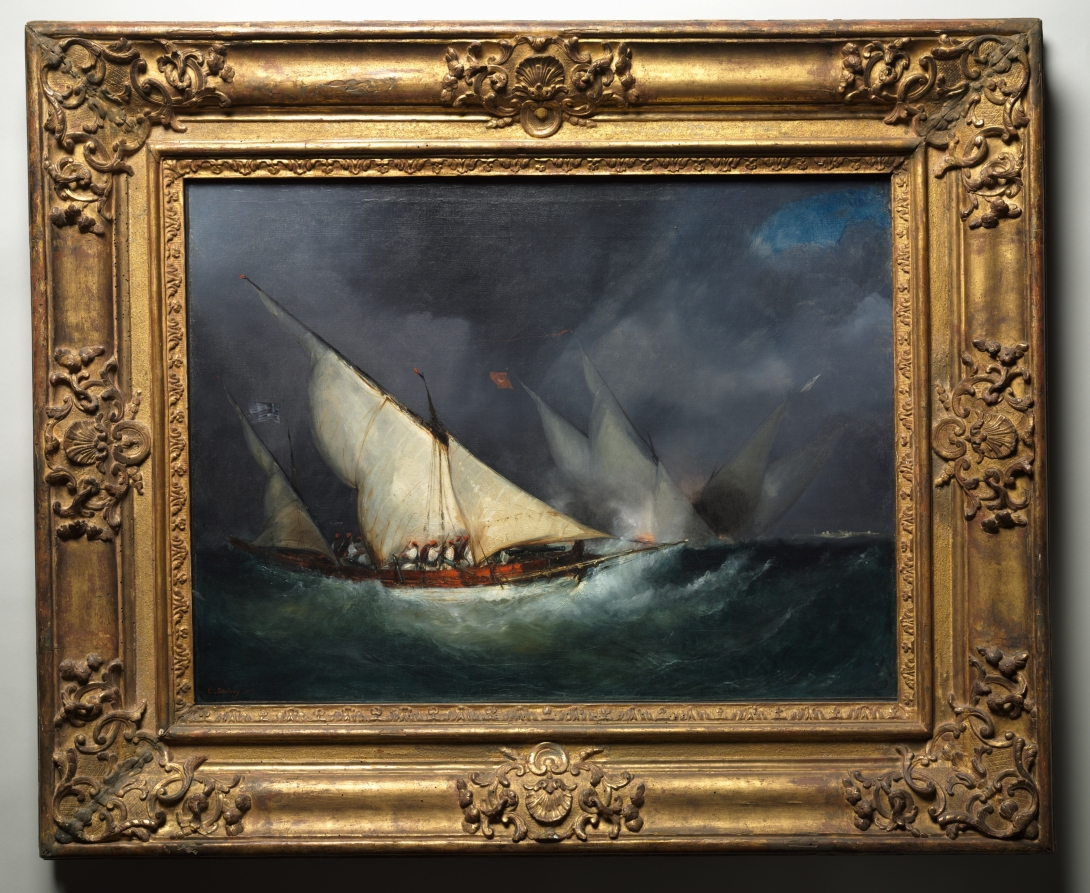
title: Greek Pirates Attacking a Turkish Vessel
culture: France, 19th century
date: not dated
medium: oil on fabric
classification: Painting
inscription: Signed lower left: E Isabey. 1827